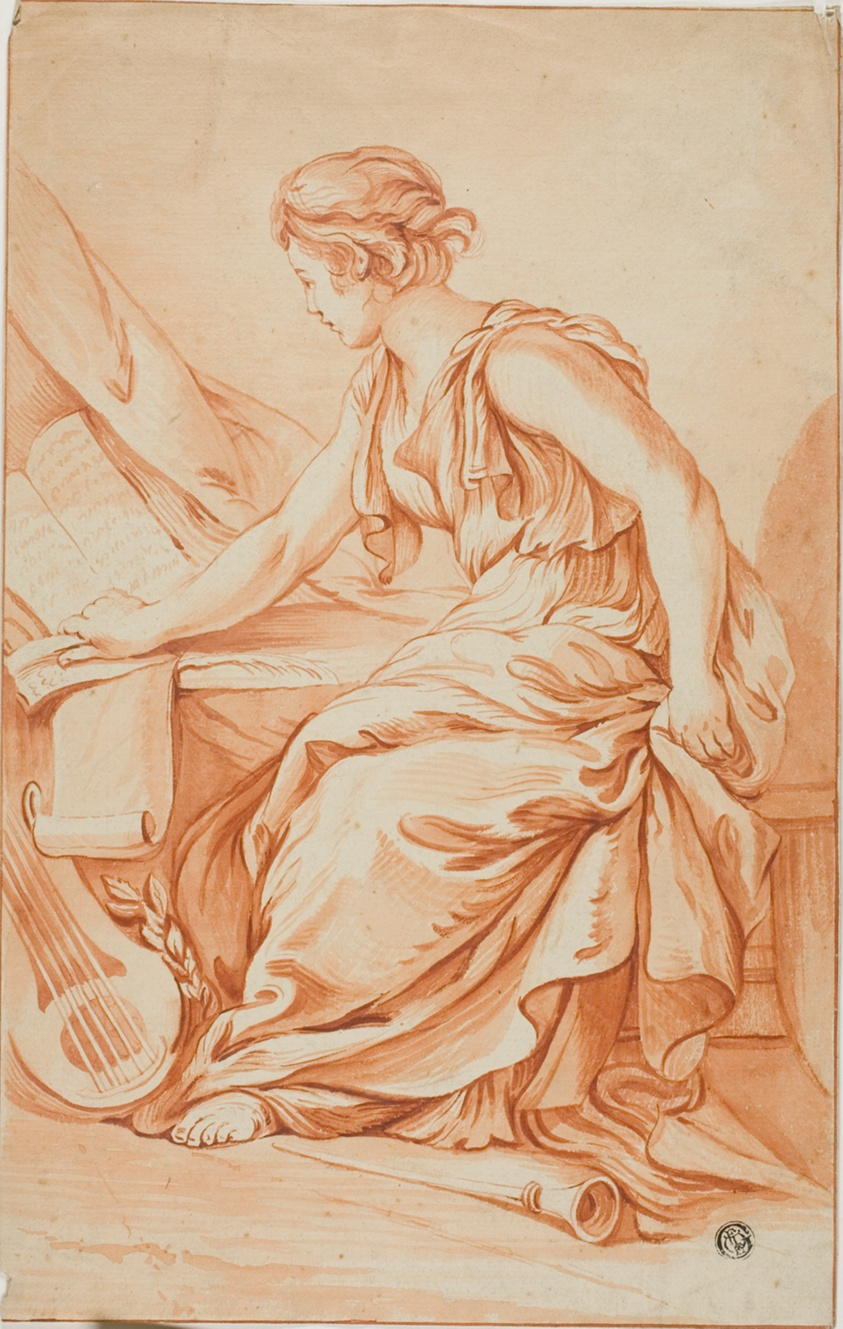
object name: Drawing and Watercolor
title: Eulerpe or Clio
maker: Possibly after Jean-Baptiste Greuze (French, 1725-1805); or follower of François Boucher (French, 1703-1770)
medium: Chalk wash on paper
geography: France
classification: ink or chalk wash; drawings (visual works); prints and drawing